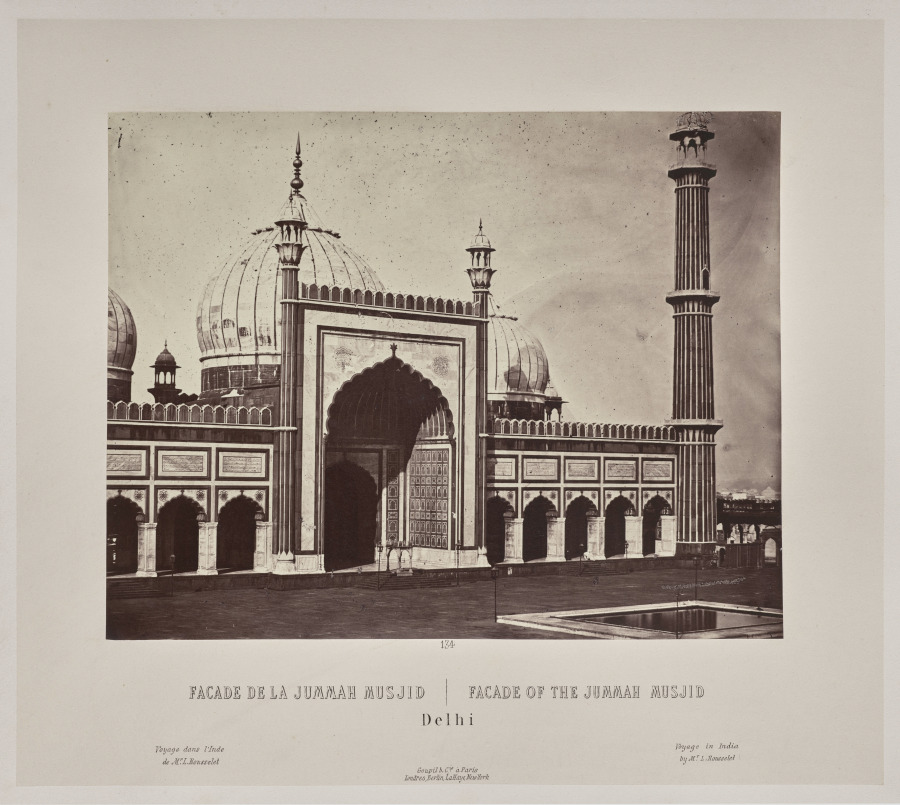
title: Facade of the Jummah Musjid, Delhi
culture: France, 19th century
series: India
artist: Louis-Théophile Marie Rousselet (French, 1845–1929)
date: 1865–68, published 1869–70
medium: Albumen print from glass plate negative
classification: Photograph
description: Concerned that his drawings did not do justice to the splendor of India’s monuments, Rousselet learned photography in India that year, a remarkable accomplishment. He proved to be a talented photographer with a sophisticated sense of composition. The scenes in this volume sweep across sites of Sultanate, Rajput, and Mughal power in northern India, from the sacred Hindu city of Varanasi on the Ganges River to Alwar in Rajasthan. Also included are several scenes of industry and portraits of Indian rulers.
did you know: Louis Rousselet described himself as a “scientific traveler” when he went to India alone at age 18 in 1863 and stayed into 1868.